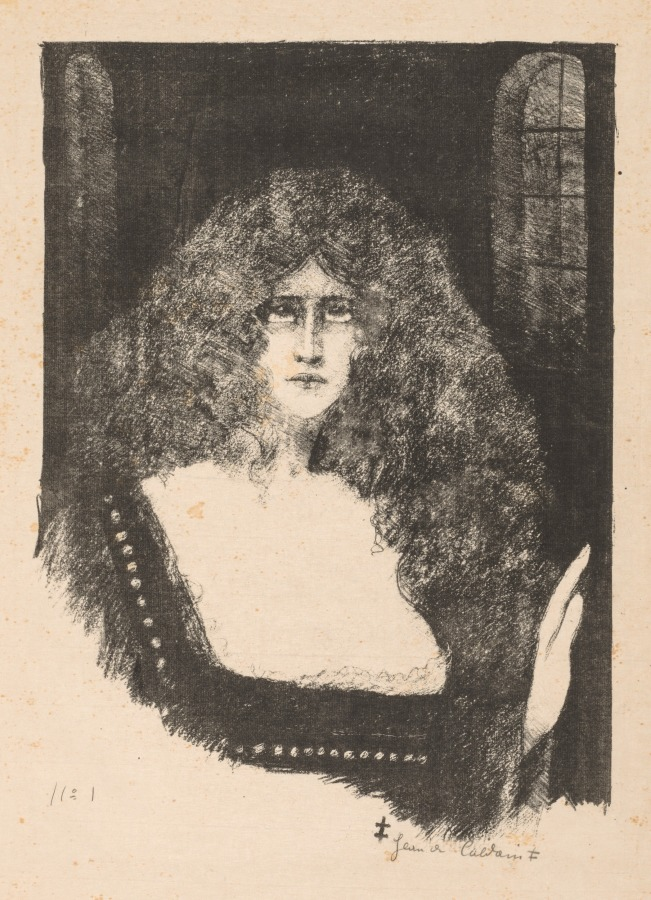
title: L'Emoi, No. 1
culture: France, 20th century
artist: Jean de Caldain (French)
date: early 1900s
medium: lithograph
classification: Print